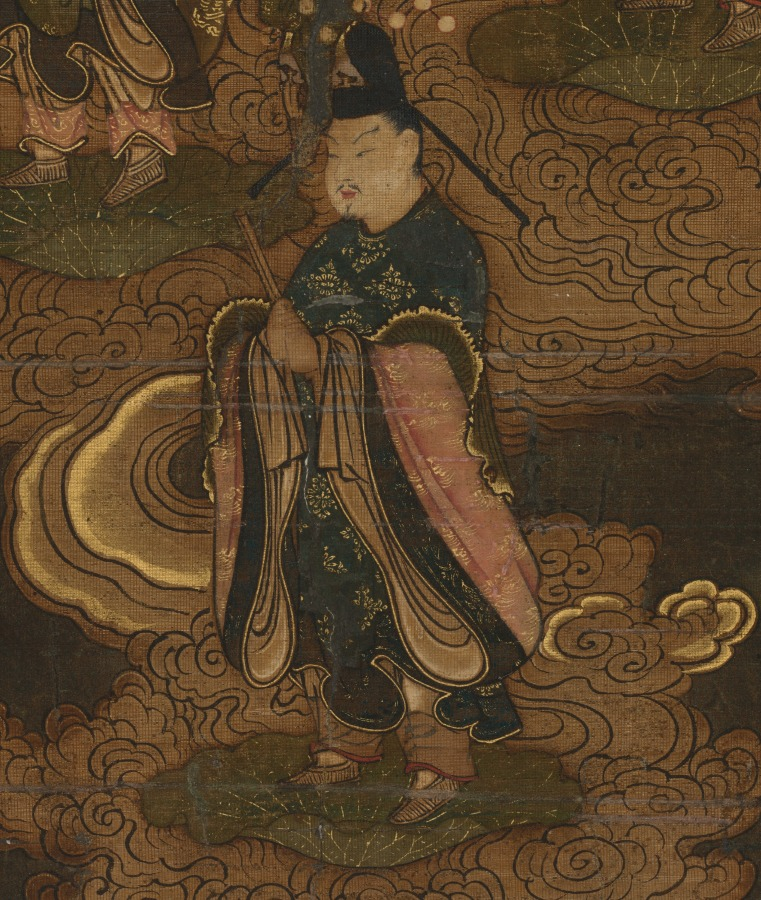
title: Descent of the Nine Luminaries and the Seven Stars at Kasuga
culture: Japan, Nanbokuchō period (1336–92)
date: mid- to late 1300s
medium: Hanging scroll; ink, color, gold and cut gold on silk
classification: Painting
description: This medieval religious painting shows celestial beings descending from the heavens into the Kasuga Shrine, a major religious site in Japan's ancient capital, Nara. The moon and the Kasuga mountain range appear in the uppermost portion of the painting, as does a red shrine entrance gate, or torii. In the upper part of the painting, figural representations of the stars in the constellation known as the Big Dipper in the West descend from right to left on cloud banks. In the lower part, the Nine Luminaries (Sanskrit: Navagraha) that emerged from the Vedic tradition—the sun and moon; the planets Jupiter, Mars, Saturn, Venus, and Mercury; and personifications of the fluctuating lunar nodes—descend in similar fashion. The painting uses the "deities in descent" scheme originating in China, as well as the original Buddhist form mandala (Japanese: honjibutsu mandarazu) format prevalent in medieval Japanese Shinto-Buddhist painting, to generate an image connected to the worship of celestial bodies in Esoteric Buddhism.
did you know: A 19th-century copy of this painting in ink and light color exists at the Kyoto City University of Arts.